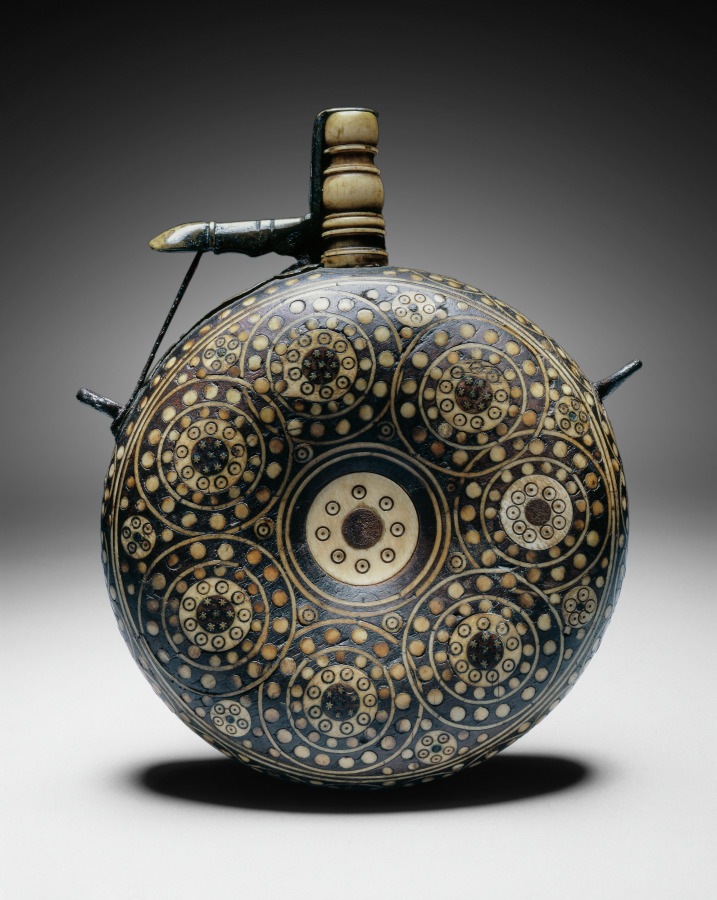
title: Powder Flask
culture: Germany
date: c. 1620–1650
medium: walnut inlaid with horn in concentric circles; turned bone funnel with brass spring cap; iron suspension loops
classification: Arms and Armor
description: Powder flasks are small, portable containers designed to hold gunpowder. From the 1400s to the 1800s, powder flasks were indispensable for charging and priming firearms of all types. Without powder flasks firearms were of little use to their owners. Many highly decorated flasks rank as works of art.